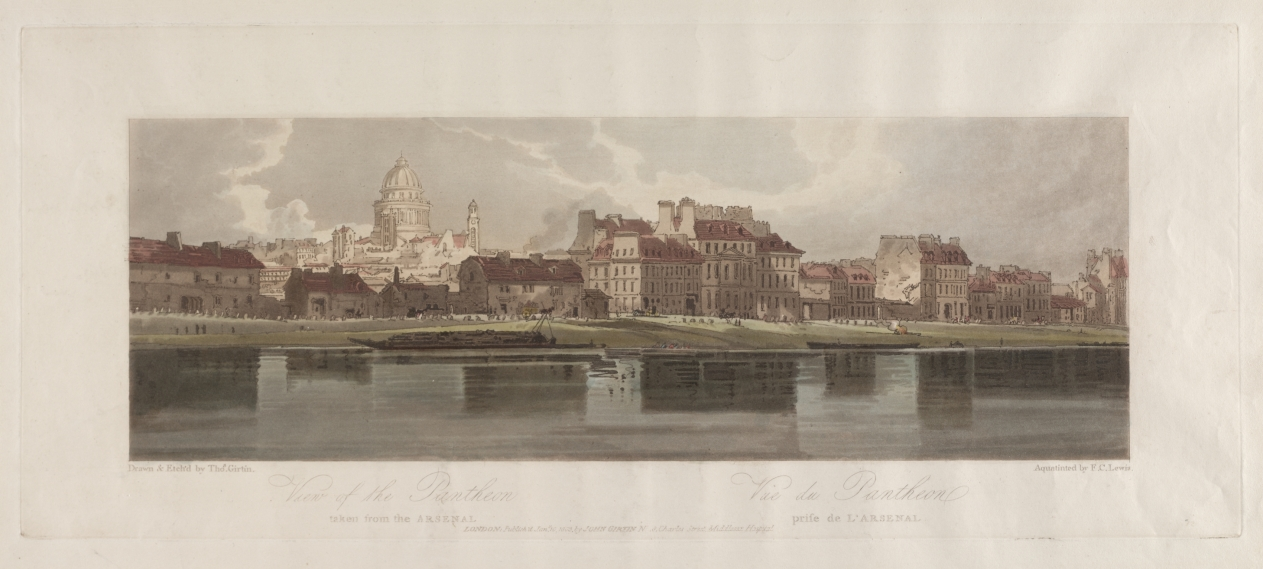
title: A Selection of Twenty of the Most Picturesque Views in Paris: View of the Pantheon taken from the Arsenal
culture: England, 19th century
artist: Thomas Girtin (British, 1775–1802)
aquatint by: Frederick Christian Lewis (British, 1779–1856)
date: 1803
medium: softground etching and aquatint printed in brown, hand-colored with watercolor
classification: Print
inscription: In plate; Drawn & Etch'd by Thos Girtin; Aquatinted by F. C. Lewis; LONDON: Pubd Jany 10 1803 by John Girtin, No. I, Little Newport Street, Gerrard Street, Soho.